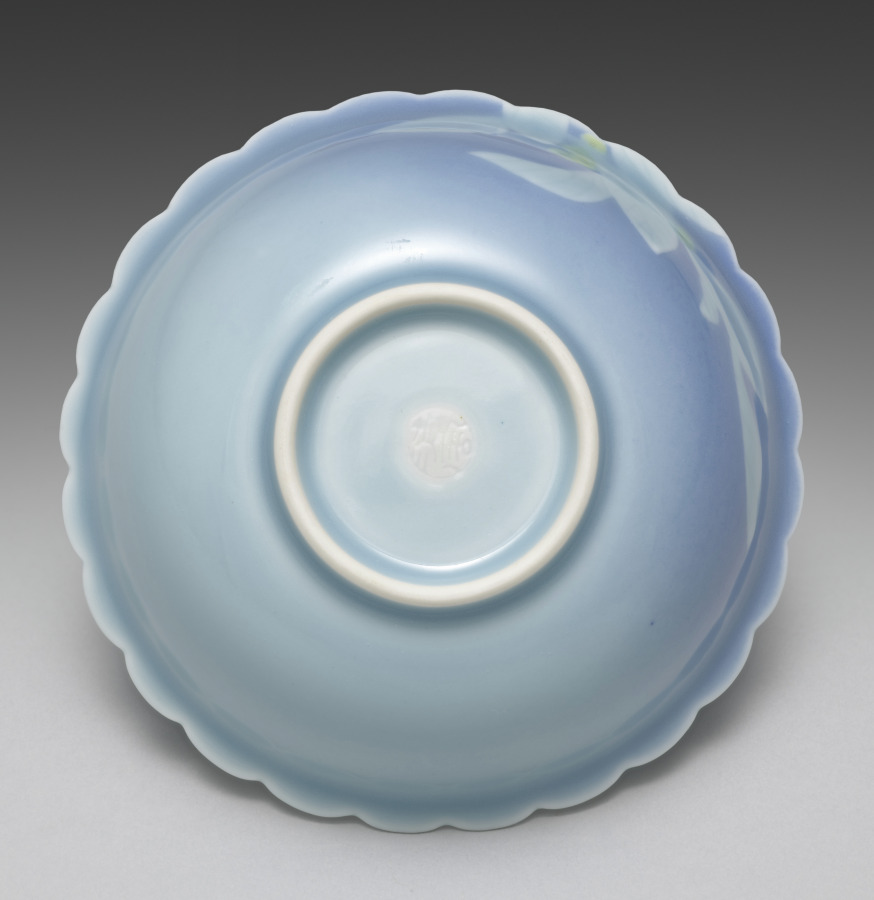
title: Dish from Dishes with Flowers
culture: Japan, Taishō period (1912–26) or Shōwa period (1926–89)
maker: Seifū Yohei IV (Japanese, 1872–1951)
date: 1914–46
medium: One from a set of five dishes; porcelain with underglaze yellow and blue glaze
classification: Ceramic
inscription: 清風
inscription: 清風造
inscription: 成山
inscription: 清風盧人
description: One can imagine a cool summer breeze when looking at this set of dishes, each shaped with a crenulated mouth and glazed with blue. Around the rim and into the basin, the bowls have low-relief designs of flowers with underglaze yellow petals; their leaves and stems show white through the glaze. On each dish, the design continues over the rim onto one side.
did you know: Seifū Yohei IV’s dishes with flowers feature underglaze yellow.